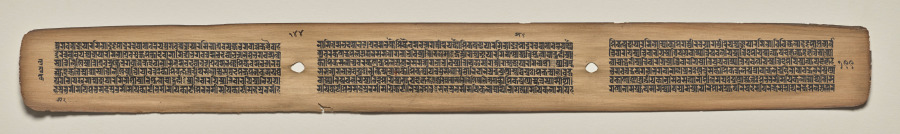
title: Text, Folio 144 (verso), from a Manuscript of the Perfection of Wisdom in Eight Thousand Lines (Ashtasahasrika Prajnaparamita-sutra)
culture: Eastern India, Bihar, Vikramashila Monastery. Painting: Nepal, Kathmandu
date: Sunday, September 14, 1119 (year 239 of the Newar Samvat in the month of Ashvina)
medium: gum tempera and ink on palm leaves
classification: Painting